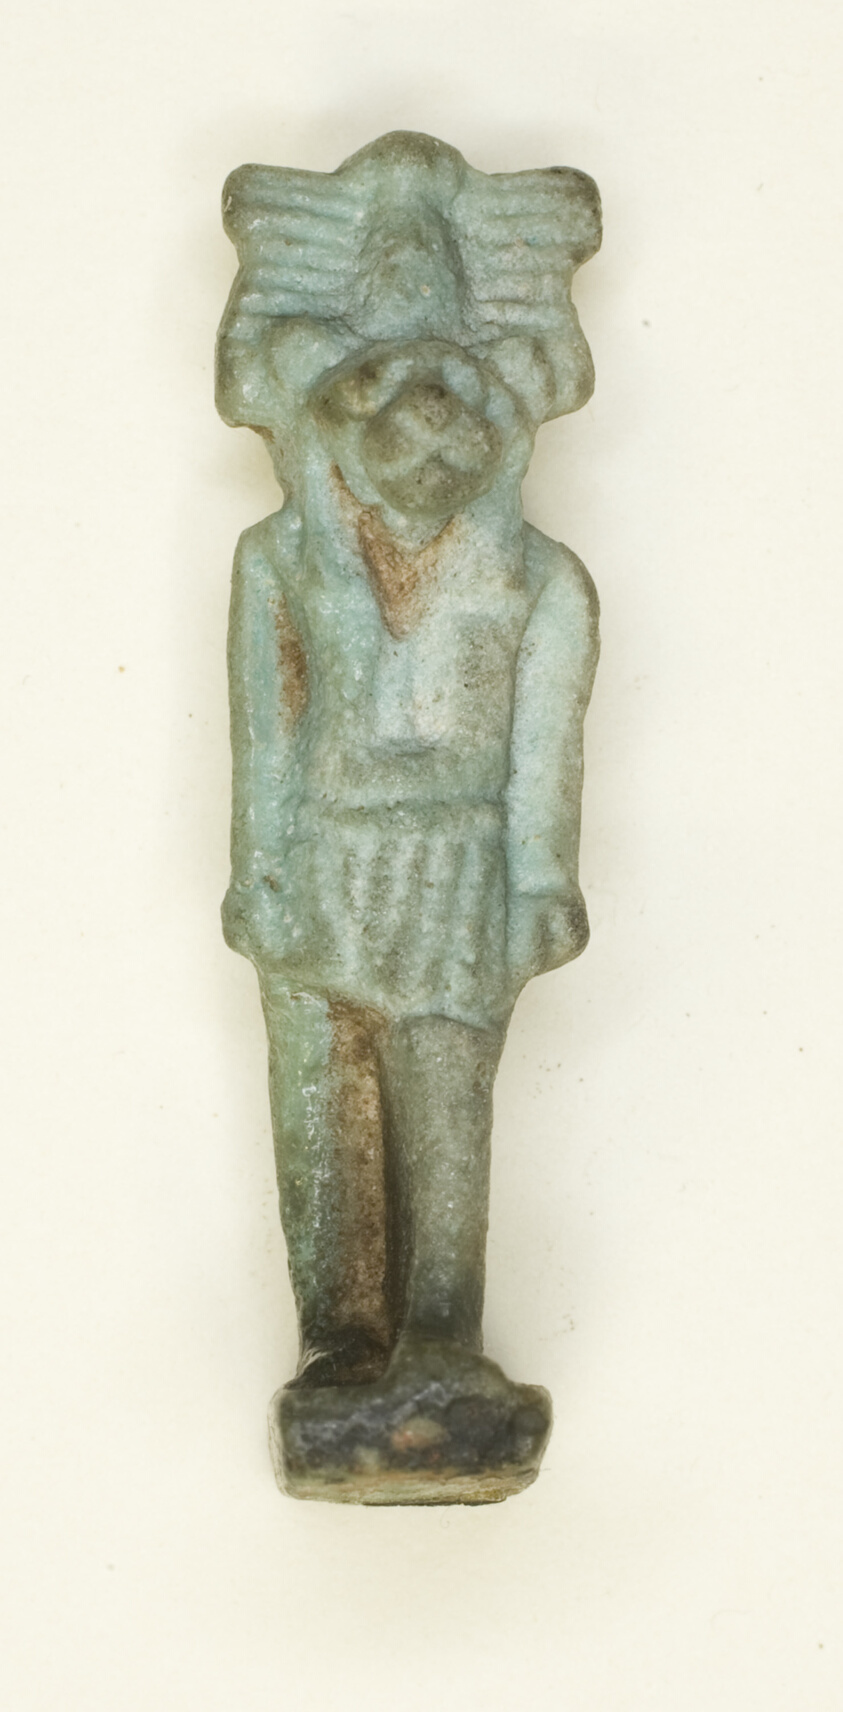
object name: Costume and Accessories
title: Amulet of the God Mahes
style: late period (egyptian), ancient, egyptian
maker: Egyptian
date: Late Period, Dynasties 26–31 (664–332 BCE)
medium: Faience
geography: Egypt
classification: amulet; jewelry; ceramics; ancient art; costume; faïence (composite material)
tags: gods (deities), lions